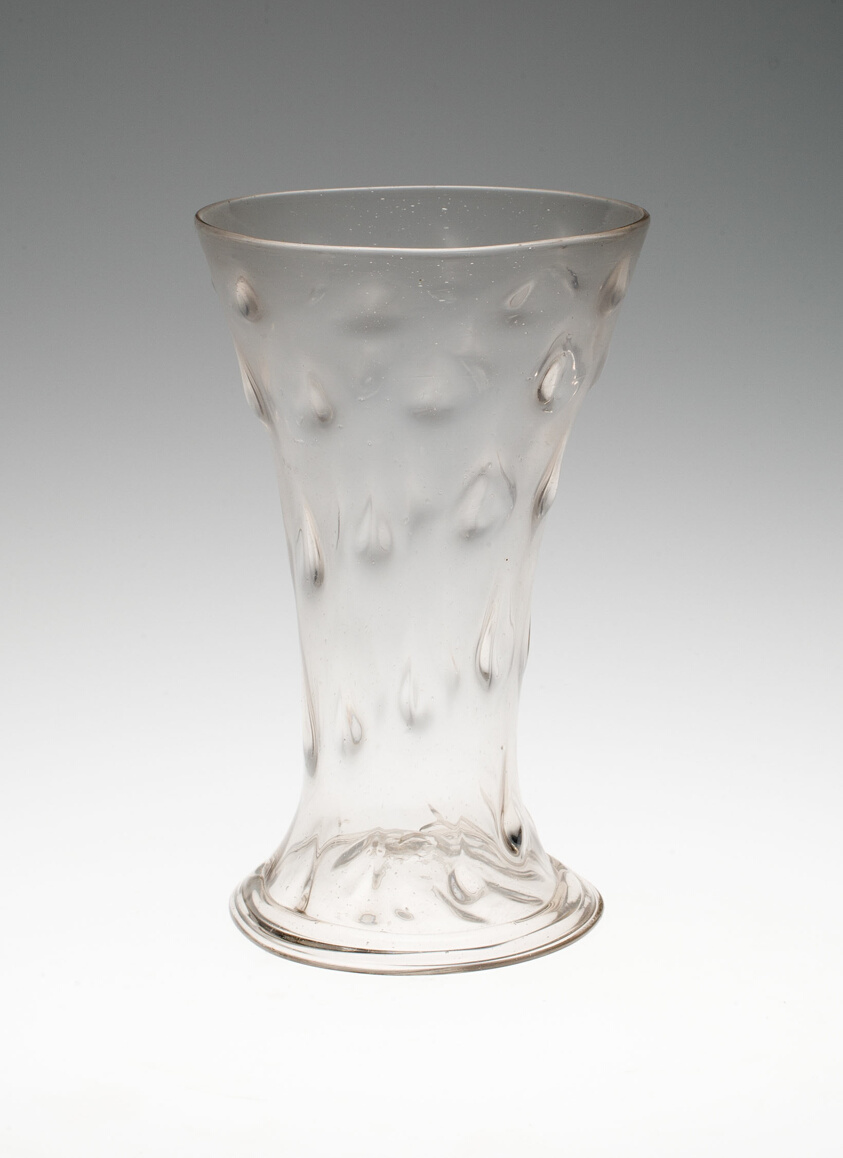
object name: Glass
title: Beaker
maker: Germany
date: 16th to 17th century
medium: Glass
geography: Germany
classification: glass; european decorative arts